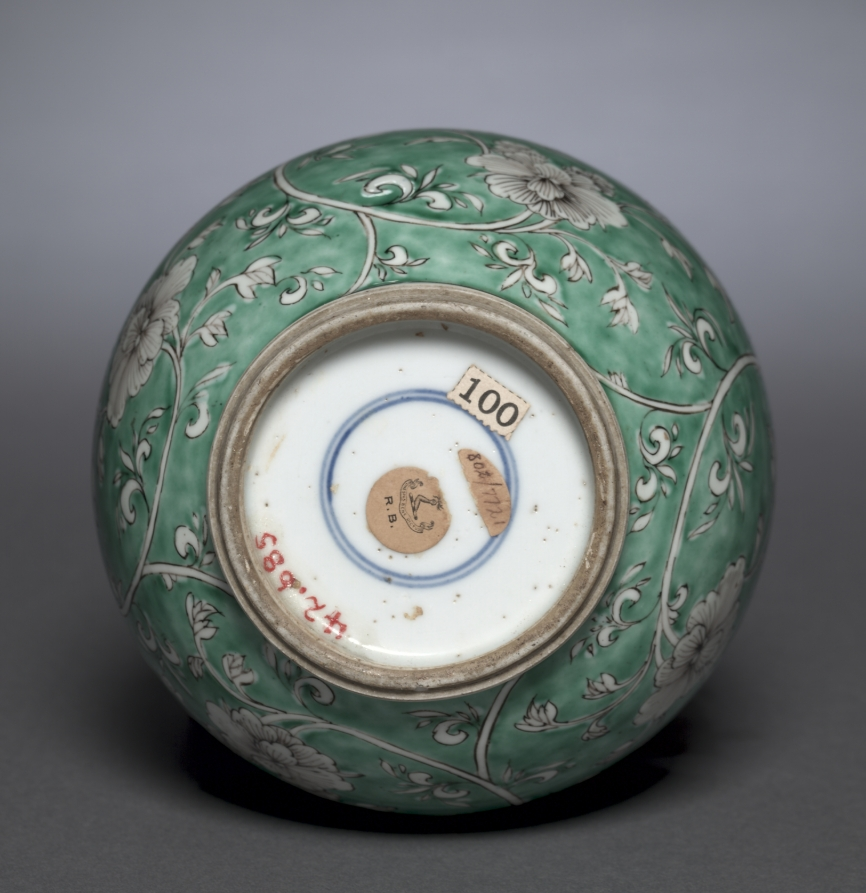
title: Bottle Vase with Floral Scrolls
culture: China, Qing dynasty (1644-1911), Kangxi reign (1661-1722)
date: 1662–1722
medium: porcelain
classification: Ceramic